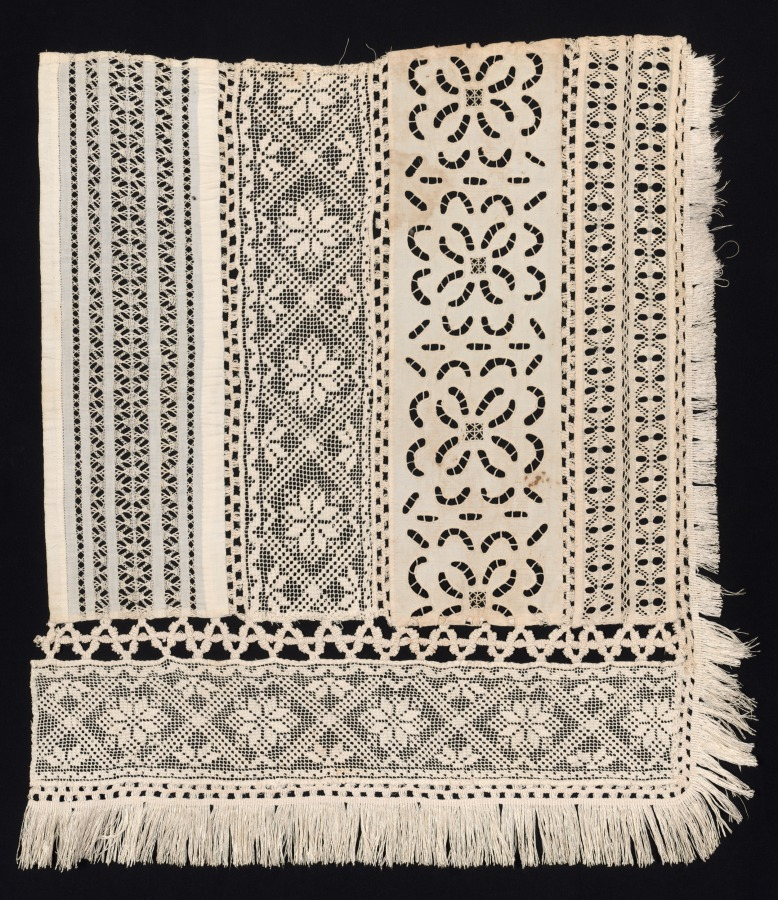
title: Corner Fragment with a Variety of Patterns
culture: Italy, 1800s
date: 1800s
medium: Bleached linen (est.): needle lace, machine-made burato (twined ground and darned in two directions), cutwork, drawnwork, and applied fringe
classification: Lace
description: Textiles often incorporate multiple needlework techniques within a single piece. One of the main techniques in this example of lace is called cutwork. In cutwork, portions of the textile ground, such as a linen or cotton cloth, are cut away and threads are removed to create holes. The edges of the hole are then reinforced with embroidery and a pattern of needle lace can be created within the perimeter. Rather than adding to the cloth to create a design, the craftsperson removes threads to fabricate a pattern.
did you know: The various techniques used in this fragment suggest that it may have been made as a sampler to practice different lacemaking techniques.